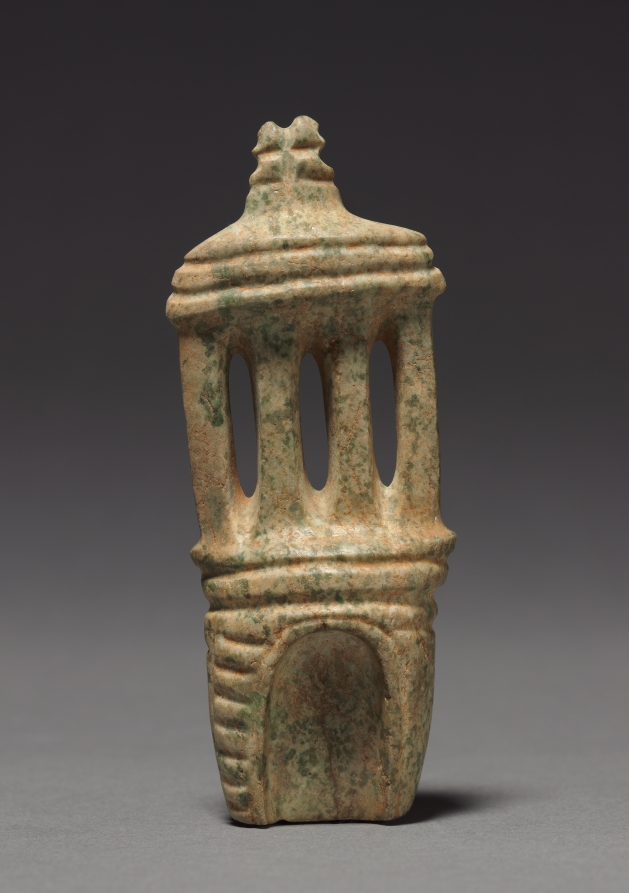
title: Architectural Model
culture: Mesoamerica, Mexico, Guerrero, Mezcala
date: 100 BCE–300 CE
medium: serpentine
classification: Sculpture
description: The Mezcala style takes its name from a river in its homeland, the Guerrero region of western Mexico. The style is known for small-scale stone sculptures including architectural “models” characterized by sleek abstraction. Because comparisons to actual architecture in the Mezcala region are scarce, it is not known whether the models refer to temples, houses, or underground funerary structures.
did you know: Mezcala architectural models reportedly come from burials, but few have been scientifically excavated.